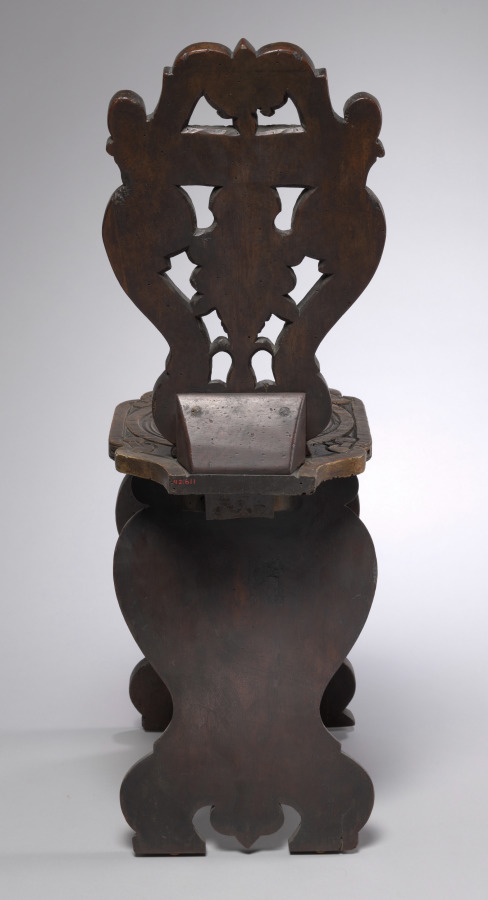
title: Chair, Sgabello type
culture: Italy, late 16th century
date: late 1500s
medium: walnut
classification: Furniture and woodwork